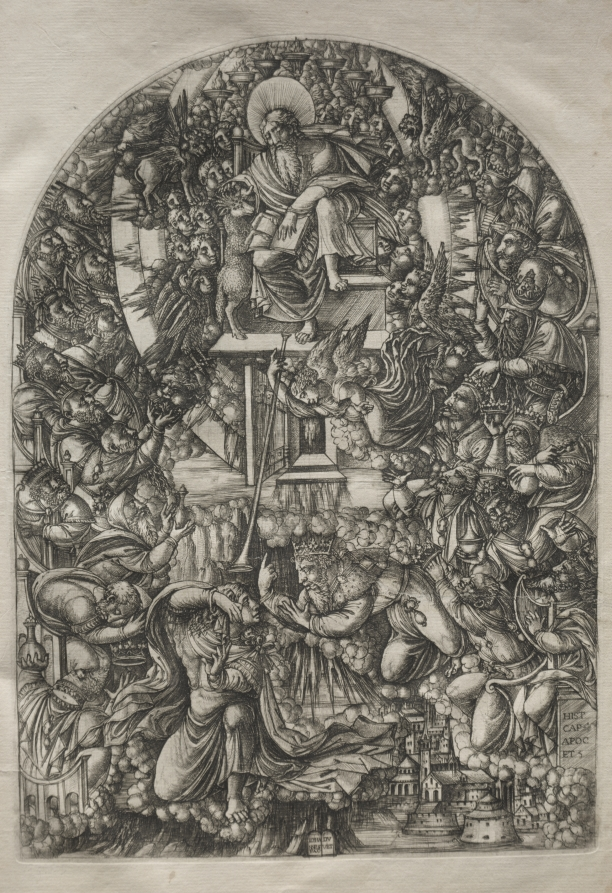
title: The Apocalypse: St. John Summoned to Heaven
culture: France, 16th century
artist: Jean Duvet (French, 1485–1561)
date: 1546–1556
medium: engraving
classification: Print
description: This print is part of a bound volume of works illustrating the a narrative of the Apocalypse, taken from the Revelation of Saint John in the Bible. The 23 engravings in the series occupied the artist for a number of years and represent his greatest artistic achievement. The museum's volume is one of only seven known complete sets. Jean Duvet was one of the first major printmakers in France and one of the most original artists of the 1500s. Although he worked mostly in the provincial city of Langres, he became aware of Italian art through the circulation of prints—notably those of Marcantonio Raimondi. His solidly modeled human figures reflect the influence of the Italian High Renaissance. Duvet, however, developed an idiosyncratic, highly artificial style with crowded compositions that ignore rational space in favor of ornamental surface patterns.